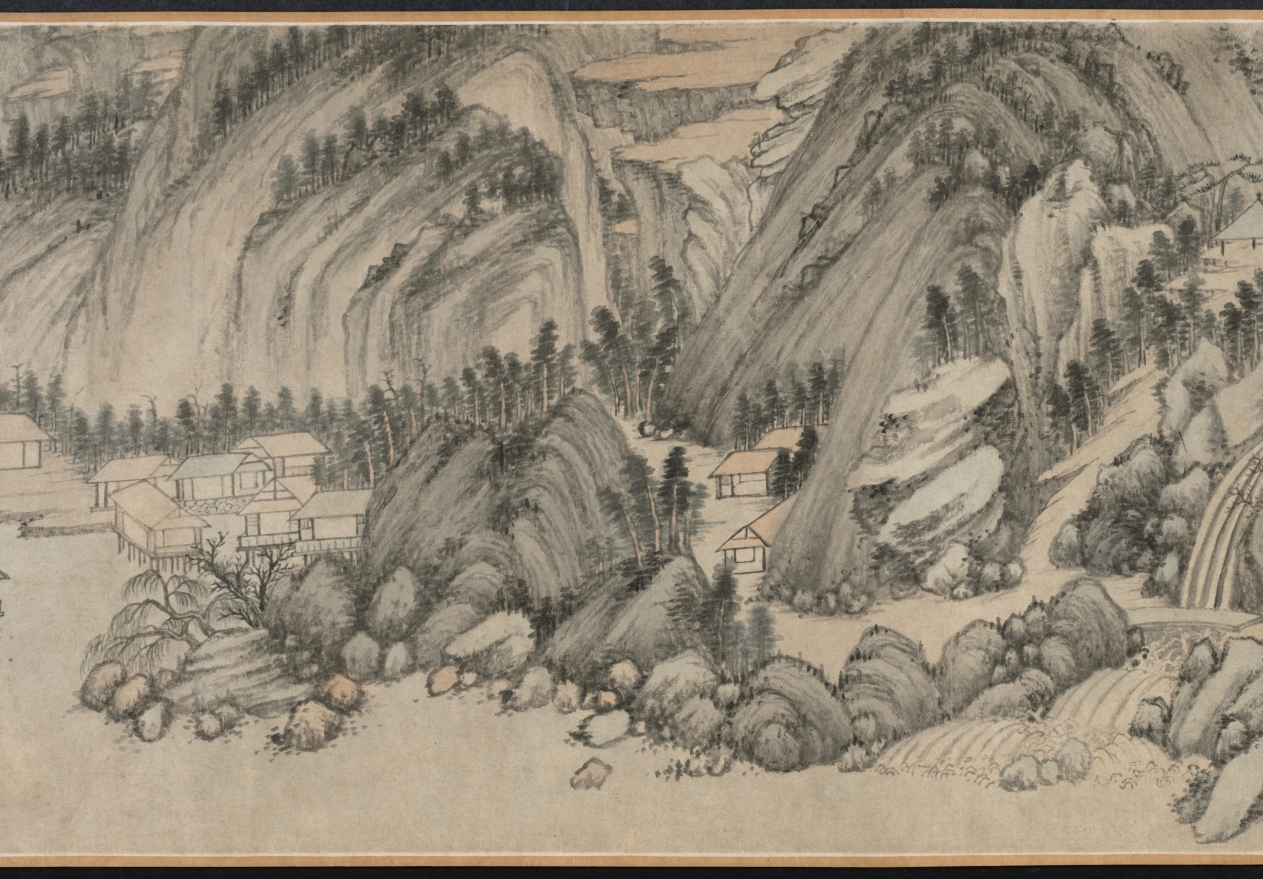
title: Mt. Taibo in the Style of Wang Meng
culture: China, Ming dynasty (1368–1644)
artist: Du Qiong (Chinese, 1396–1474)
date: 1442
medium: handscroll; ink and light color on paper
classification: Painting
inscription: Artist's inscription, signature, and 11 seals: [1 seal] Tung-yüan chai. Huang-ho-shan-ch'iao [Wang Meng] painted a painted called T'ai-po Mountain. Its brushwork is superior and admirable, which is very close to Yu-ch'en [Wang Wei, 699-759]. The cleverness of its composition, the maple groves and rustic temples, the inaccessible ravines and autumnal plateaus, the periolous peaks and strange rocks, etc., all seem to be so natural. The paper is only a little over eight feet, but the landscape has the range of a thousand miles. Once you open and note the contents, it is as if one were roaming among the mountain peaks enveloped in mist and clouds, and forgot the dusty world. When I first saw this, I was so mixed with excitement and joy that I could not take my hands off the painting. So I put it on the table, and tried my best to imitate it, forgetting sleeping and eating for about three months before it was completed. Although I do not dare to tread in the footsteps of Huang-ho shan ch'iao, I took great pains to capture his spirit in composition and colors. I do not know whether it would pass the judgment of the experts. On the fifteenth day of the fifth month, the seventh year of the Cheng-t'ung year [1442], inscribed by Tung-yüan, Tu Chiung. [2 seals] Yung-chia; Ching-chieh ming-men. [8 seals on painting] Tung-yüan chai; Ching-chieh ming-men; Yung-chia; Tu Ch'iung yin; Tung-yüan (repeated 5 times). trans. WKH/LYSL 3 colophons and 7 additional seals: 1 colophon and 2 seals of Chou Ting (1401-1487); 1 colophon and 2 seals of Wu K'uan (1435-1504); 1 colophon, dated 1655, and 2 seals of Lan Ying (1585-after 1664).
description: When a Chinese painter "imitated" a painting by a past master, the intention was never to produce an exact copy. Du Qiong, the Ming painter from Suzhou, is a case in point. The painting style of this handscroll is actually closer to that of Huang Gongwang (1269–1354) than to the style of Wang Meng (about 1301–1385). Both masters were active during the previous dynasty and are among the so-called Four Great Masters of the Yuan dynasty (1279–1368). In this painting, the interplay of styles, including Du Qiong's own, contribute to an inner dimension that is more than visual. Mt. Taibo is located in the province of Zhejiang and is known for its scenic beauty. In this scroll, however, it is not depicted literally. The image is an ideal representation of mountains in southeastern China.